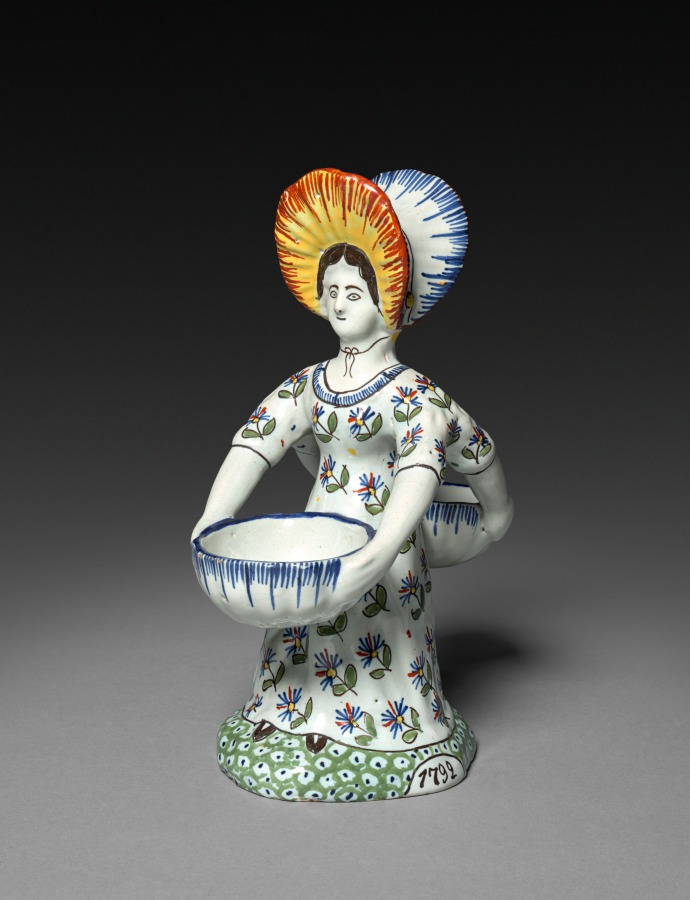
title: Double-faced Figure of a Woman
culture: France, Clermont-Ferrand, 18th century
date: 1792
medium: faience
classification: Ceramic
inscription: at bottom of skirt on outside in black: "1792."